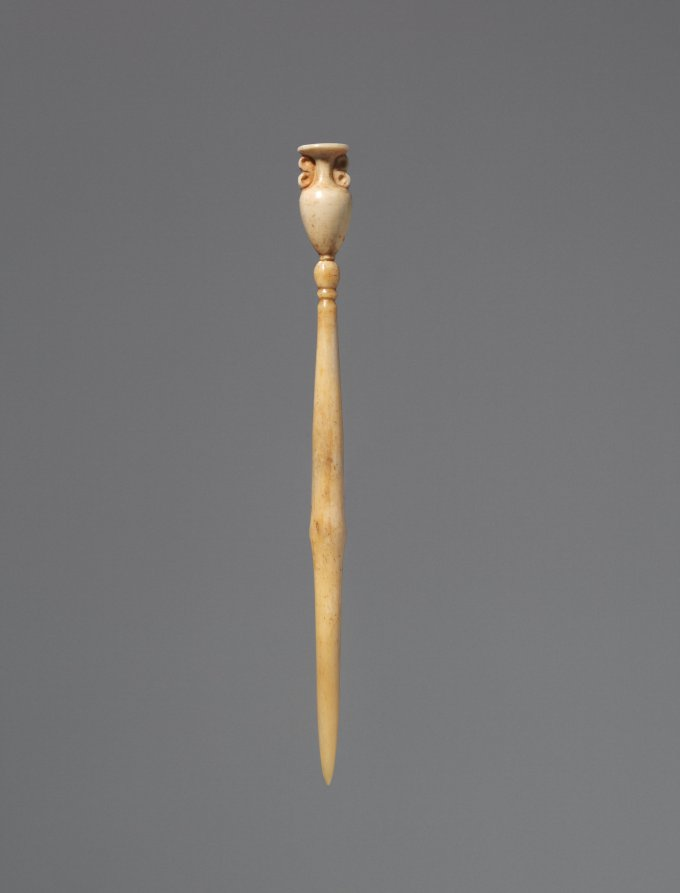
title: Hairpin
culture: Greece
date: 400s BCE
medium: ivory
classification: Ivory